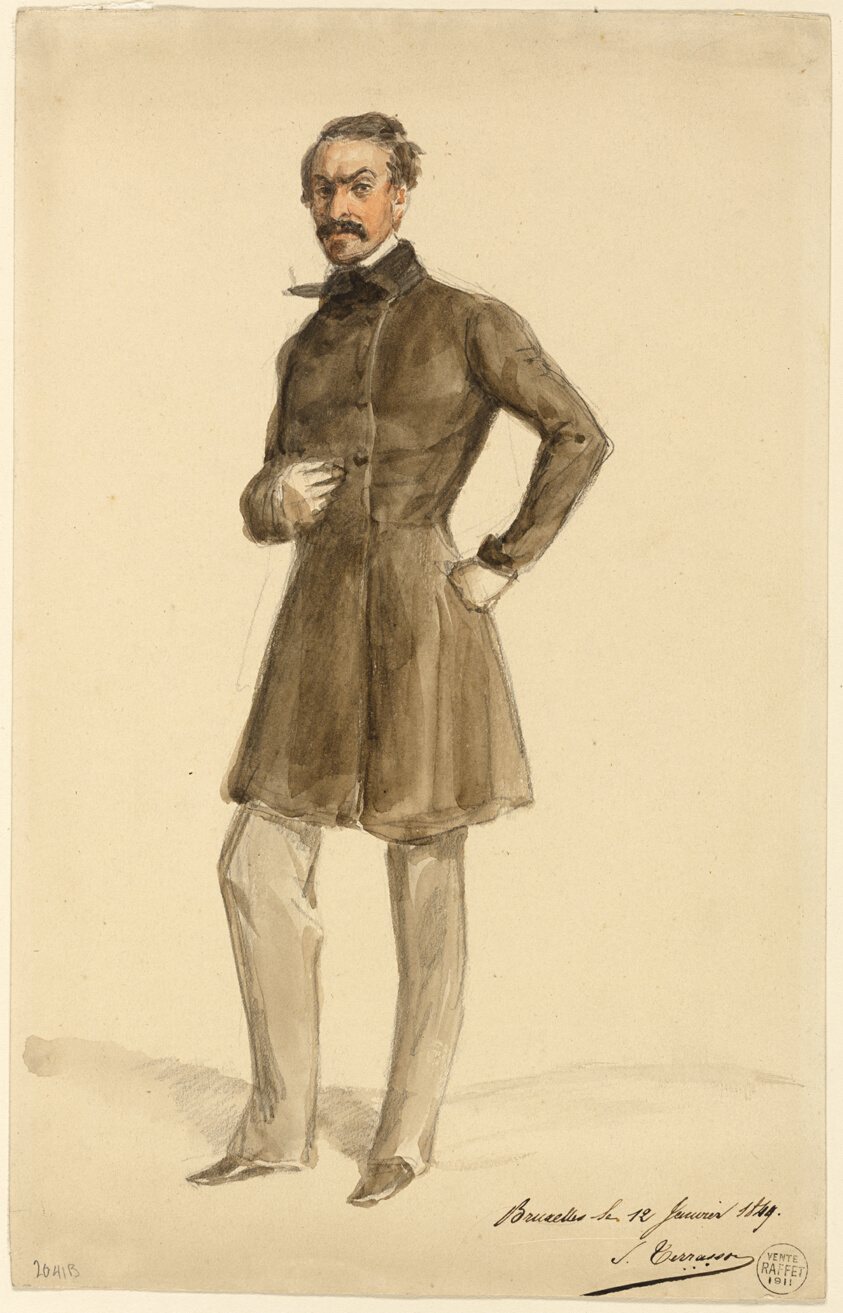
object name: Drawing and Watercolor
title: S. Terrason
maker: Denis Auguste Marie Raffet (French, 1804-1860)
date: 1849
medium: Watercolor, over graphite, on cream wove paper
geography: France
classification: watercolor; drawings (visual works); prints and drawing